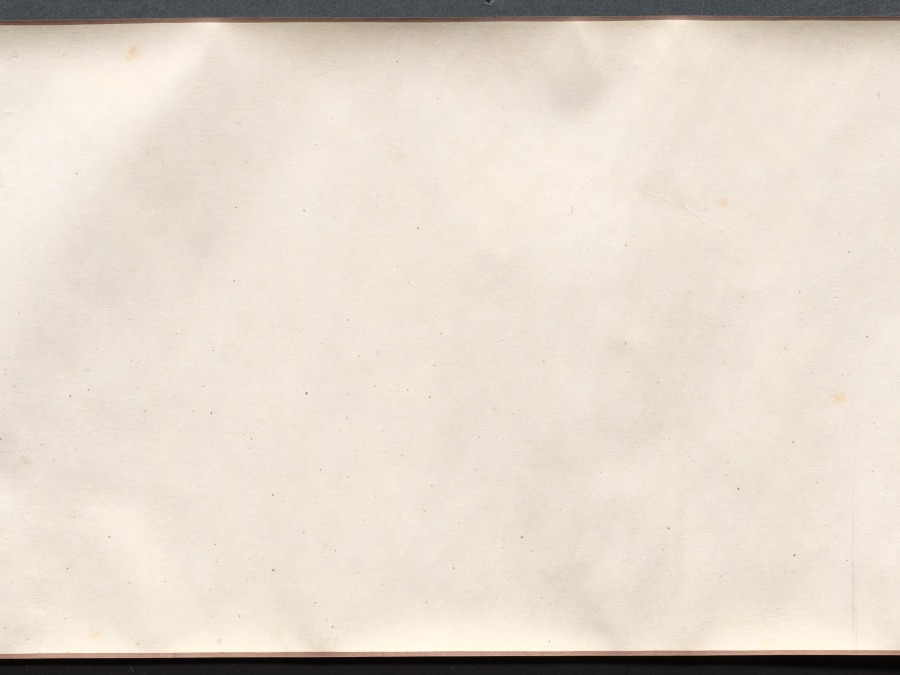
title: Four Poems: Calligraphy in Cursive Script (xingshu)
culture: China, Ming dynasty (1368–1644)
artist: Chen Jiru (Chinese, 1558–1639)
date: 1500s-1600s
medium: handscroll; ink on gold speckled paper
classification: Calligraphy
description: Written in graceful calligraphy with well-composed characters, the artist communicates his thoughts and state of mind in four poems. Characters written in dark, thick strokes convey rhythm, and indicate the moment after the writer had paused to recharge his brush with ink. Chen Jiru was a native of Huating (modern Shanghai). His calligraphy style resembles that of his friend, influential calligrapher Dong Qichang (1555–1636). Unlike Dong, Chen did not pursue government service: he burned his Confucian robes, declined a summons to serve at court, and immersed himself in literature, calligraphy, and painting.